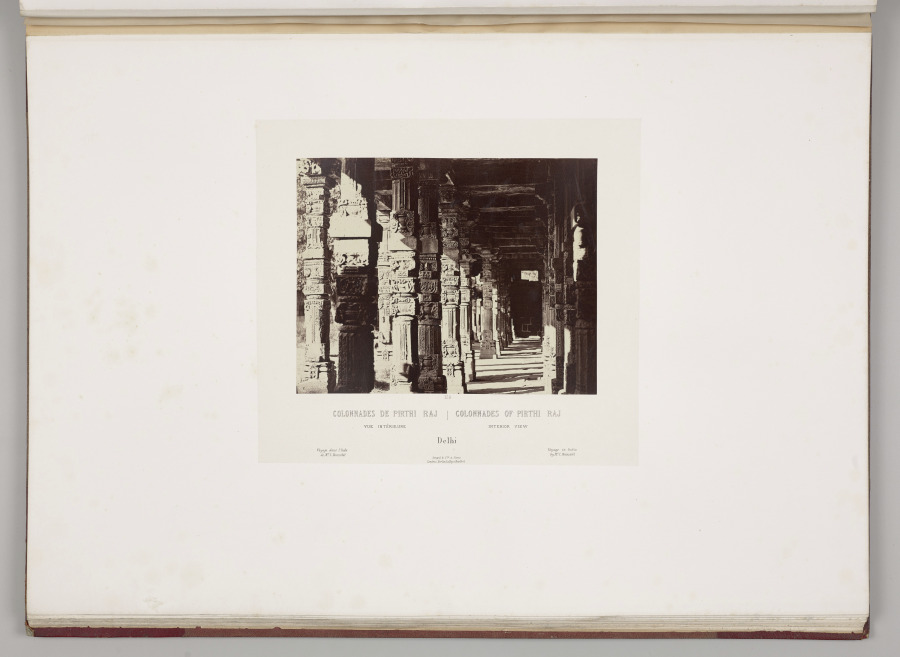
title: Colonnades of Pirthi Raj, Interior View, Delhi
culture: France, 19th century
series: India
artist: Louis-Théophile Marie Rousselet (French, 1845–1929)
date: 1865–68, published 1869–70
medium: Albumen print from glass plate negative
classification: Photograph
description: Concerned that his drawings did not do justice to the splendor of India’s monuments, Rousselet learned photography in India that year, a remarkable accomplishment. He proved to be a talented photographer with a sophisticated sense of composition. The scenes in this volume sweep across sites of Sultanate, Rajput, and Mughal power in northern India, from the sacred Hindu city of Varanasi on the Ganges River to Alwar in Rajasthan. Also included are several scenes of industry and portraits of Indian rulers.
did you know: Louis Rousselet described himself as a “scientific traveler” when he went to India alone at age 18 in 1863 and stayed into 1868.